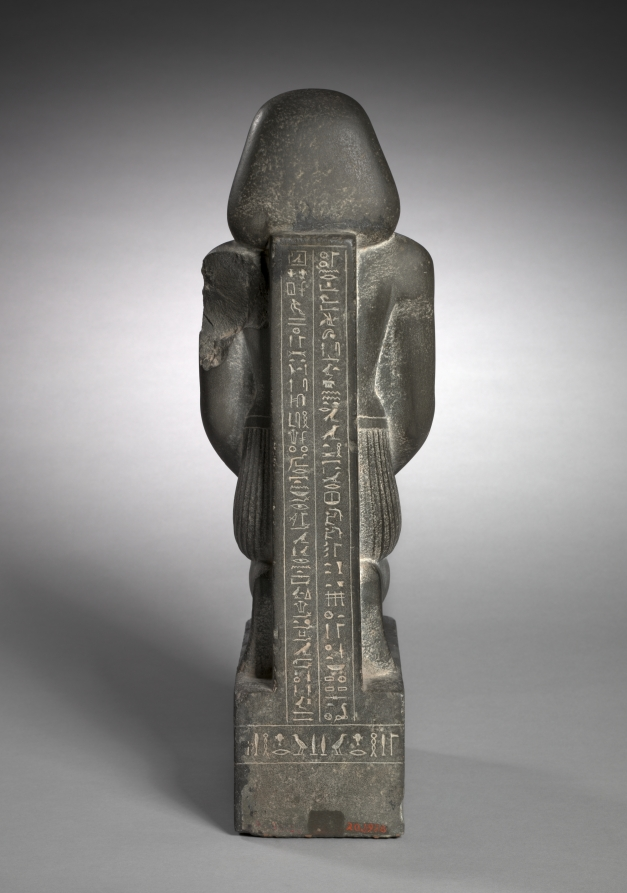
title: Naophorous Statue of the Finance Officer and Overseer of Fields, Horwedja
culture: Egypt, Late period (715–332 BCE), Dynasty 27, reign of Darius I (522–486 BCE)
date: 521–486 BCE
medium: graywacke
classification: Sculpture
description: Naophorous (naos.bearing) statues show the subject holding a naos, or shrine, containing an image of a deity, in this case the god Ptah of Memphis. These statues were very popular during the Late Period. Almost invariably they are of hard stone, made to last for eternity. As finance officer under Darius I, Horwedja was in a good position to afford such a monument. Darius I was the second Persian king to rule over Egypt and the only one who seems to have had a genuine appreciation of the country. Egypt prospered under his rule, and the arts flourished.